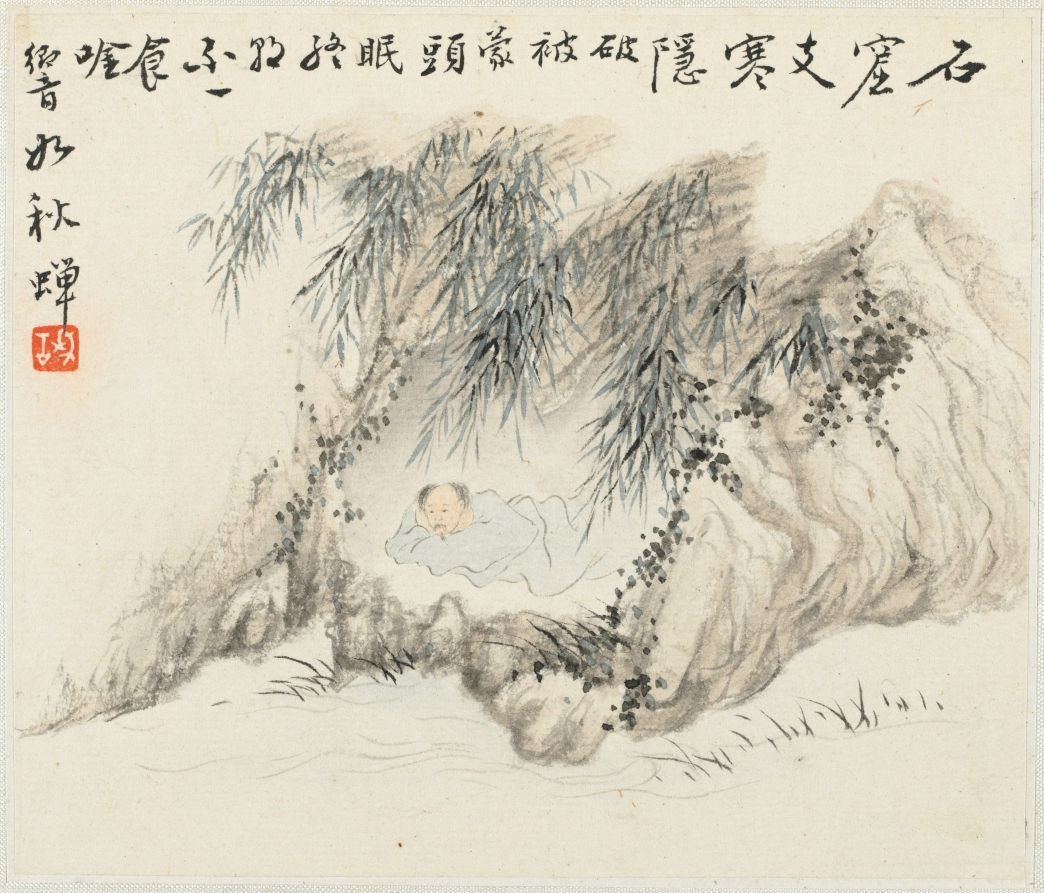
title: Album of Landscape Paintings Illustrating Old Poems: Man Resting under Bamboo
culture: China, Qing dynasty (1644-1911)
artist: Hua Yan (Chinese, 1682–c. 1765)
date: 1745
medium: album leaf, ink and light color on paper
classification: Painting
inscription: Calligraphy above and to left of image; seal below calligraphy on left